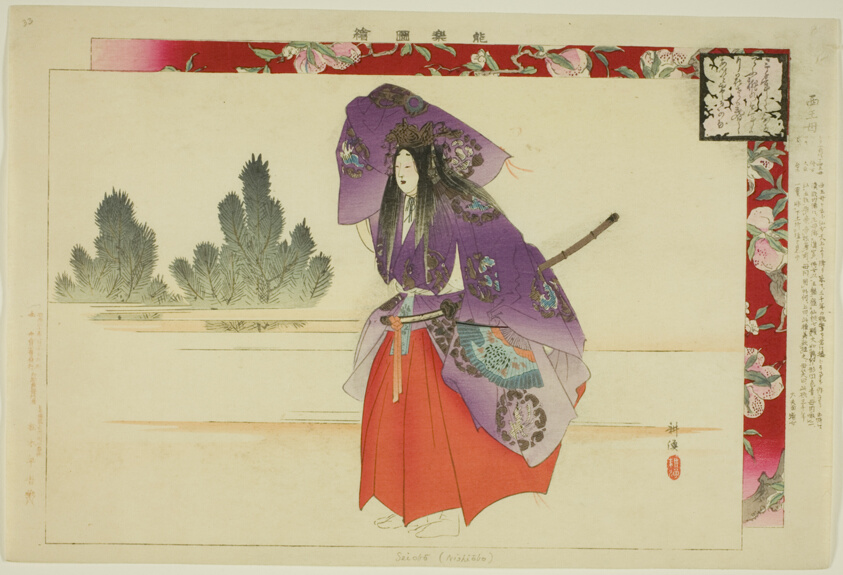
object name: Print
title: Seiobo, from the series "Pictures of No Performances (Nogaku Zue)"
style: Japanese (culture or style)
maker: Tsukioka Kogyo; Japanese, 1869-1927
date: 1898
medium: Color woodblock print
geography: Japan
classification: woodblock print; print; asian art